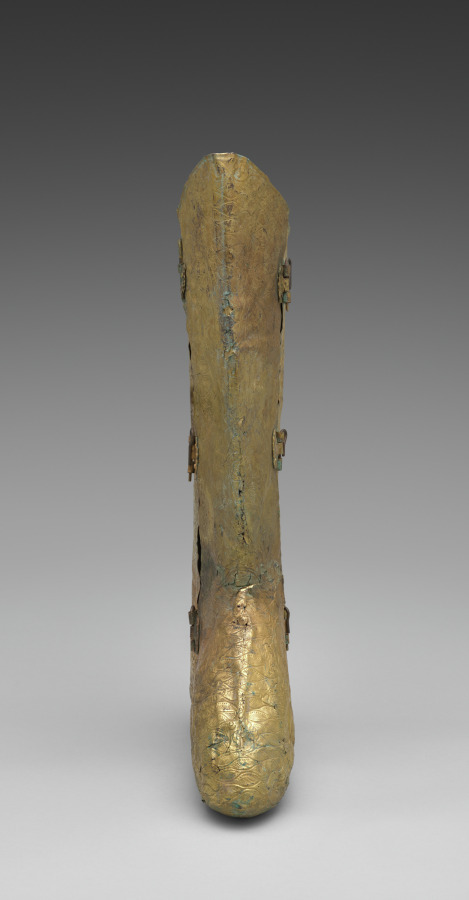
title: Gilt-bronze Boot, One of a Pair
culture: Northern China, Liao dynasty (907-1125)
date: 907–1125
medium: Gilt-bronze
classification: Metalwork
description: Bronze and silver-gilt boots, modeled after textile and leather boots, were found in Liao tombs. A pair of silver-gilt boots (dated 1018 or earlier) with phoenix motifs and cloud scrolls, were excavated from the tomb of Princess Chen and Xiao Shaoju in Inner Mongolia at Qinglongshan town in Naiman Banner; the couple’s faces were covered with gold masks. This gilt-bronze boot shows rising dragons chasing pearls and may have been made for a male tomb occupant.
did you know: The boot's dragon motif suggests that the wearer was a male princely member of the ruling family.